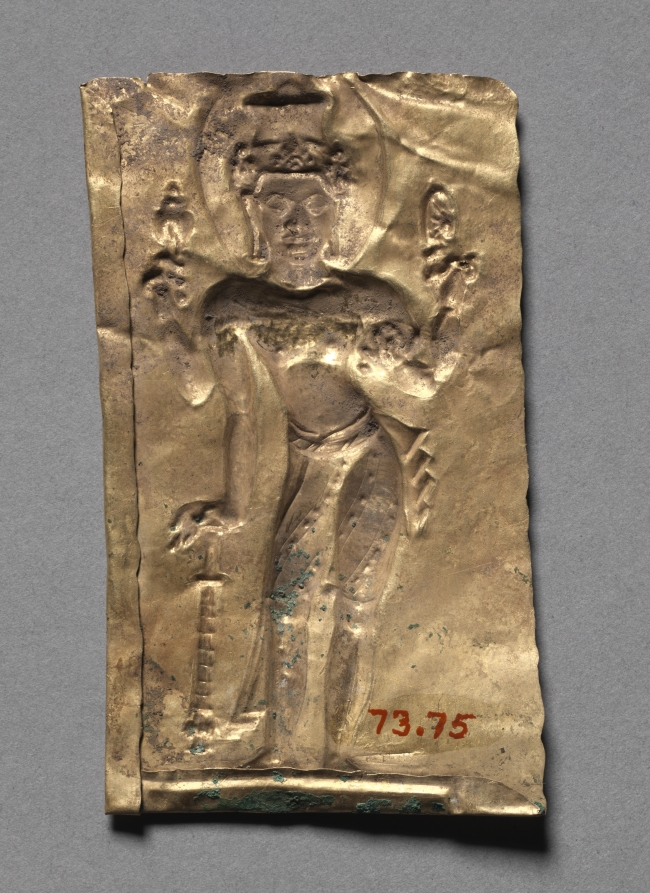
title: Plaque with Vishnu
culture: Thailand, Sri Deb Style, Mon-Dvaravati period, c. 7th-8th Century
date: c. 600s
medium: gold repoussé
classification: Metalwork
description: Images made in India during the Gupta period (AD 300s to 600s) were influential in shaping the early development of Buddhist and Hindu art in Southeast Asia. This gold token depicts the Hindu god Vishnu, identified by the flat-topped crown, his four arms, and attributes: wheel, conch shell, club, and clod of earth. Noteworthy for its naturalism is the foreshortening of his right foot. Such precious gold objects were made to be secreted under a sacred stone icon in Thailand or Cambodia to infuse the temple with wealth and glory.